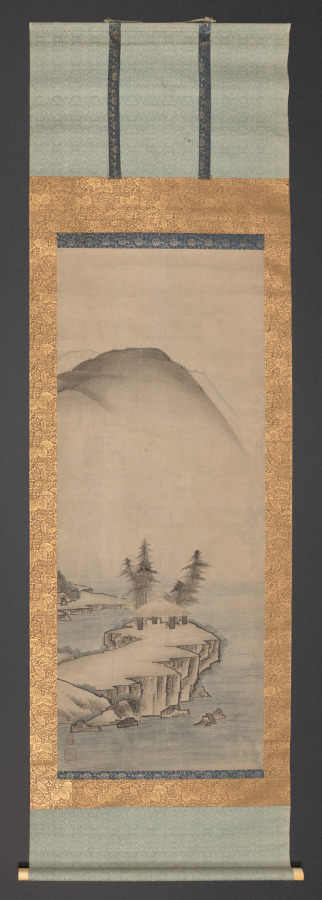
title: Landscapes (one of a pair)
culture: Japan, Edo period (1615–1868)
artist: Unkoku Tōyo (Japanese, 1612–1688?)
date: mid- to late 1600s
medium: hanging scroll; ink and light color on paper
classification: Painting